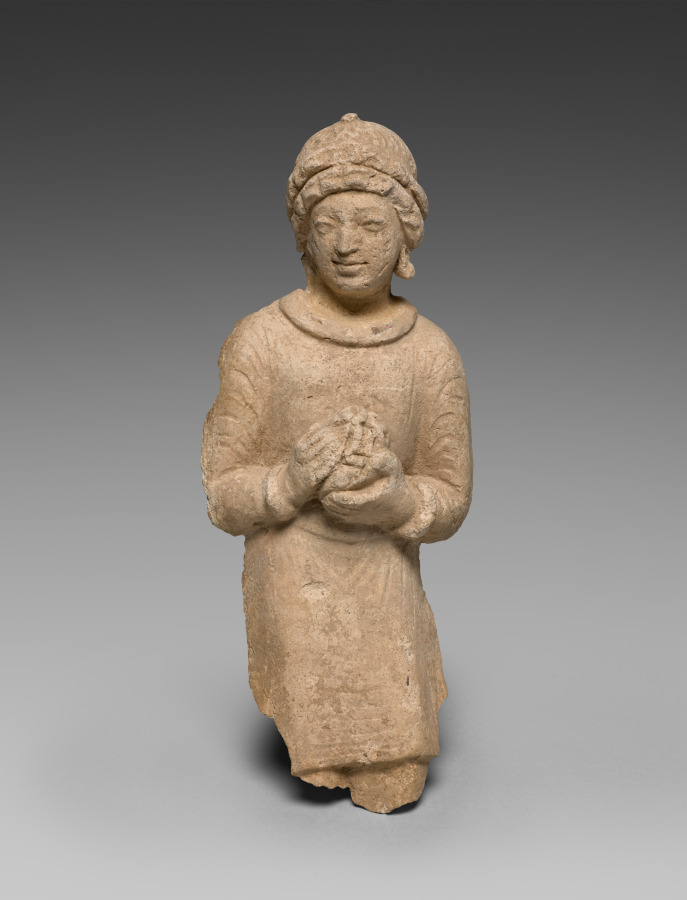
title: Layman bearing offerings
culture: Afghanistan, Hadda, probably Tape Shotor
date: c. 300 CE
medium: stucco with mother-of-pearl inlay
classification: Sculpture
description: The Buddhist monasteries at Hadda were famous internationally until their destruction by fire in the 800s CE. One thousand years later, a British explorer named Charles Masson (1800–1853) documented the site and collected many sculptures from the ruins that are now in the British Museum in London. French archaeologists carried out systematic excavations between 1926 and 1929. They brought many sculptures to the National Museum of Asian Art, Guimet, in Paris. Some sculptures entered other museum and private collections around the world. In the 1970s, Afghan archaeologists continued to document the Buddhist sites of Hadda and brought many more sculptures to the National Museum of Afghanistan in Kabul.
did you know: The Buddhist community (sangha) consists of both monks and laypeople who brought wealth to support the monasteries at Hadda.